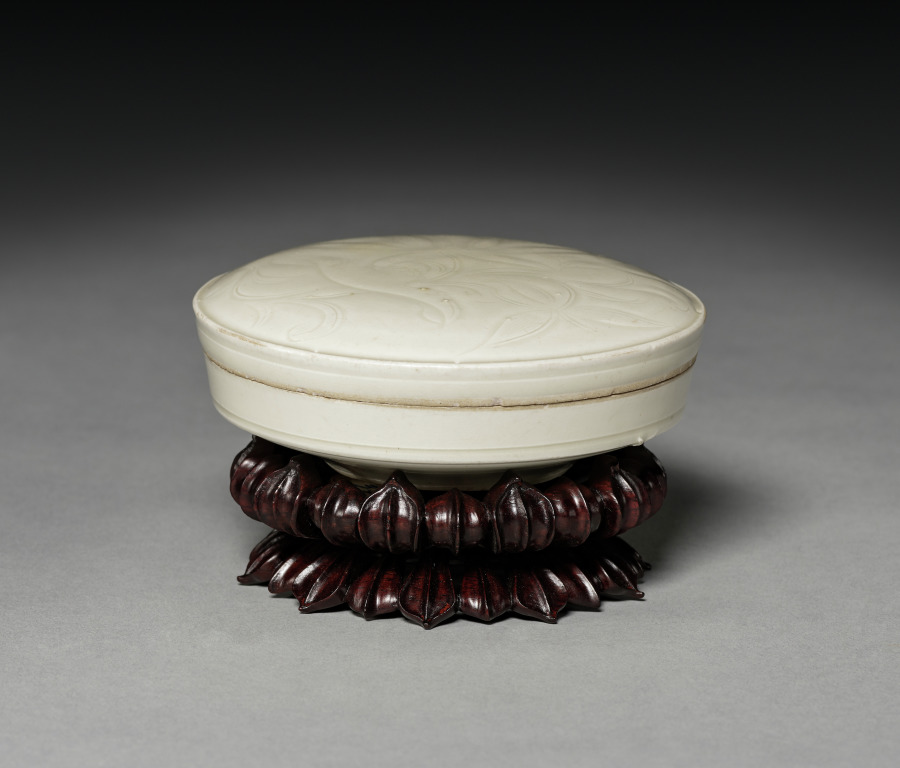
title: Covered Box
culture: China, Hebei province, Quyang, Northern Song dynasty (960-1127) to Jin dynasty (1115-1234)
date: 1100s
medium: cream-glazed porcelain with incised decoration, Ding ware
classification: Ceramic